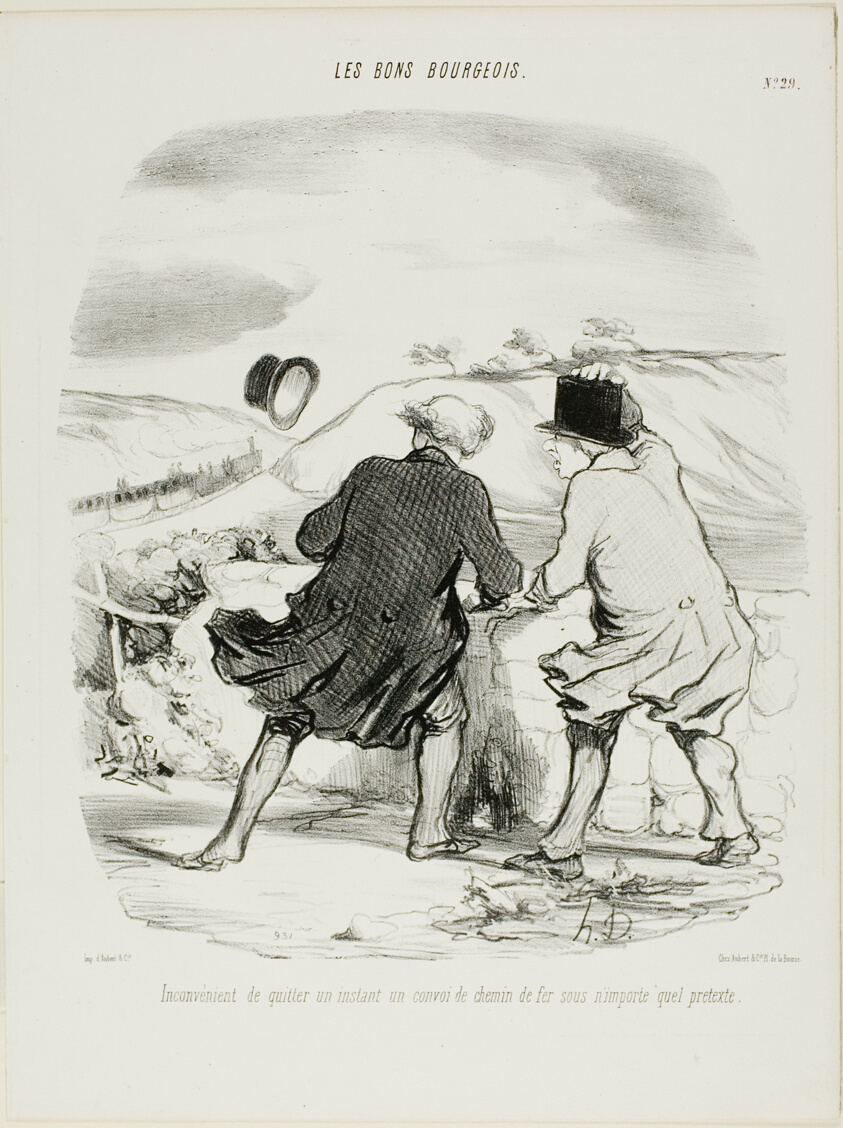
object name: Print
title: The inconvenience of leaving the train even only for a moment and for any pretext whatsoever, plate 29 from Les Bons Bourgeois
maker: Honoré Victorin Daumier; French, 1808-1879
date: 1847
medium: Lithograph in black on white wove paper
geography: France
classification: lithograph; print; prints and drawing